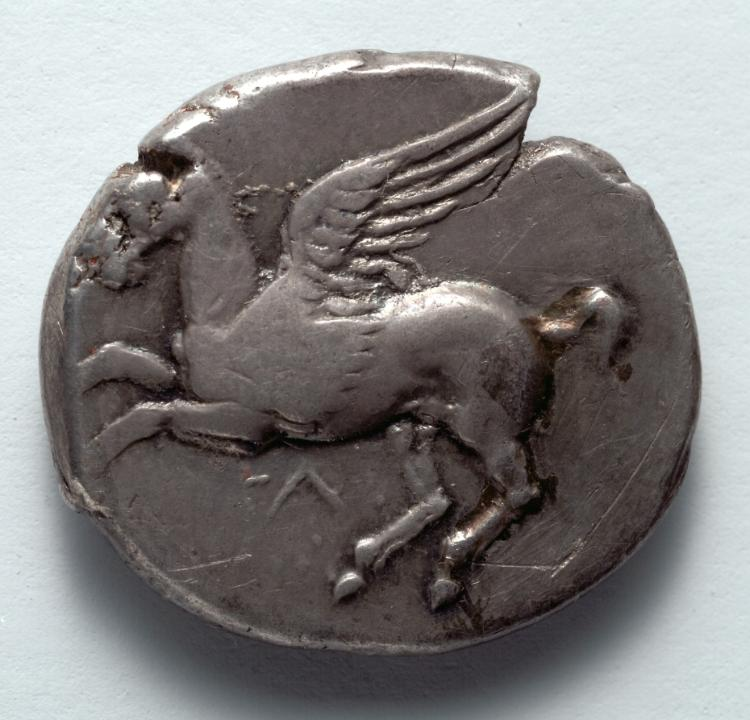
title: Corinthian Stater: Pegasos (obverse)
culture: Greece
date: c. 350–300 BCE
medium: silver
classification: Coins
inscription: Λ